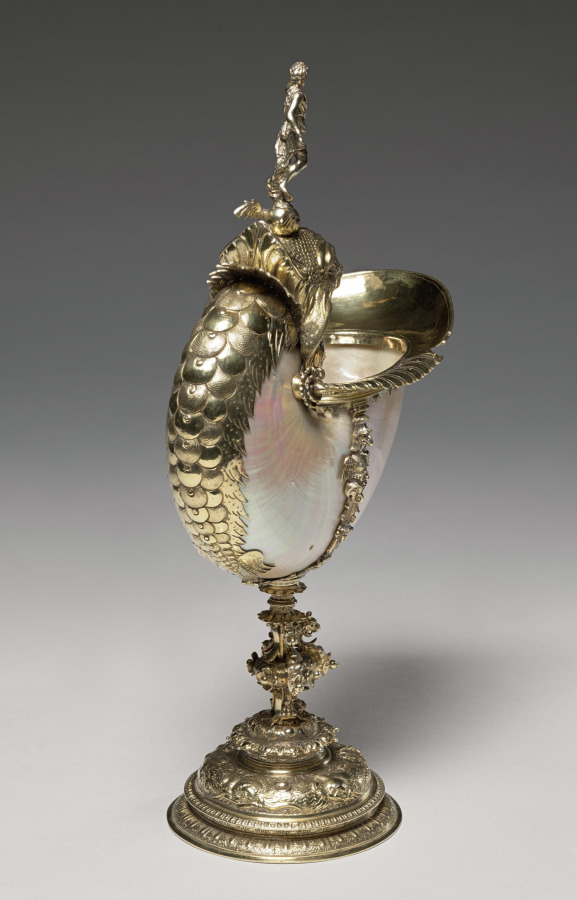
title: Nautilus Cup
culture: Netherlands, Holland, Delft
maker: Cornelis Jansz van der Burch (Dutch, active in Delft, d. 1615)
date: 1607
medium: Silver-gilt, nautilus shell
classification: Metalwork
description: Nautilus shells were brought to the Netherlands from Indonesia. Skilled Dutch silversmiths mounted them in silver, creating luxurious vessels that were sought after by wealthy collectors. Early Dutch nautilus cups are mainly associated with the city of Delft, although only a few other examples made in Delft are known from the late sixteenth and early seventeenth centuries. They feature the dramatic motif of a sea monster’s head.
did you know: The nautilus is a marine mollusk that swims by expelling water from its shell using jet propulsion.